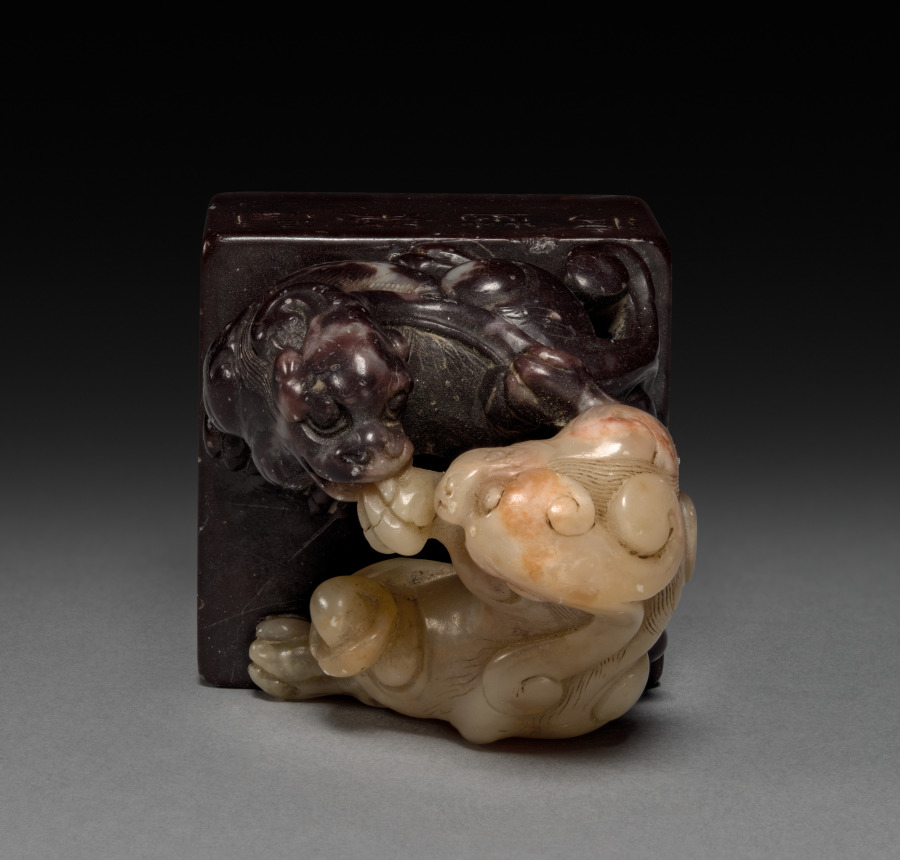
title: Seal with Two Qilin Playing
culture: China, Qing dynasty (1644-1911)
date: 1849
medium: onyx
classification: Stone